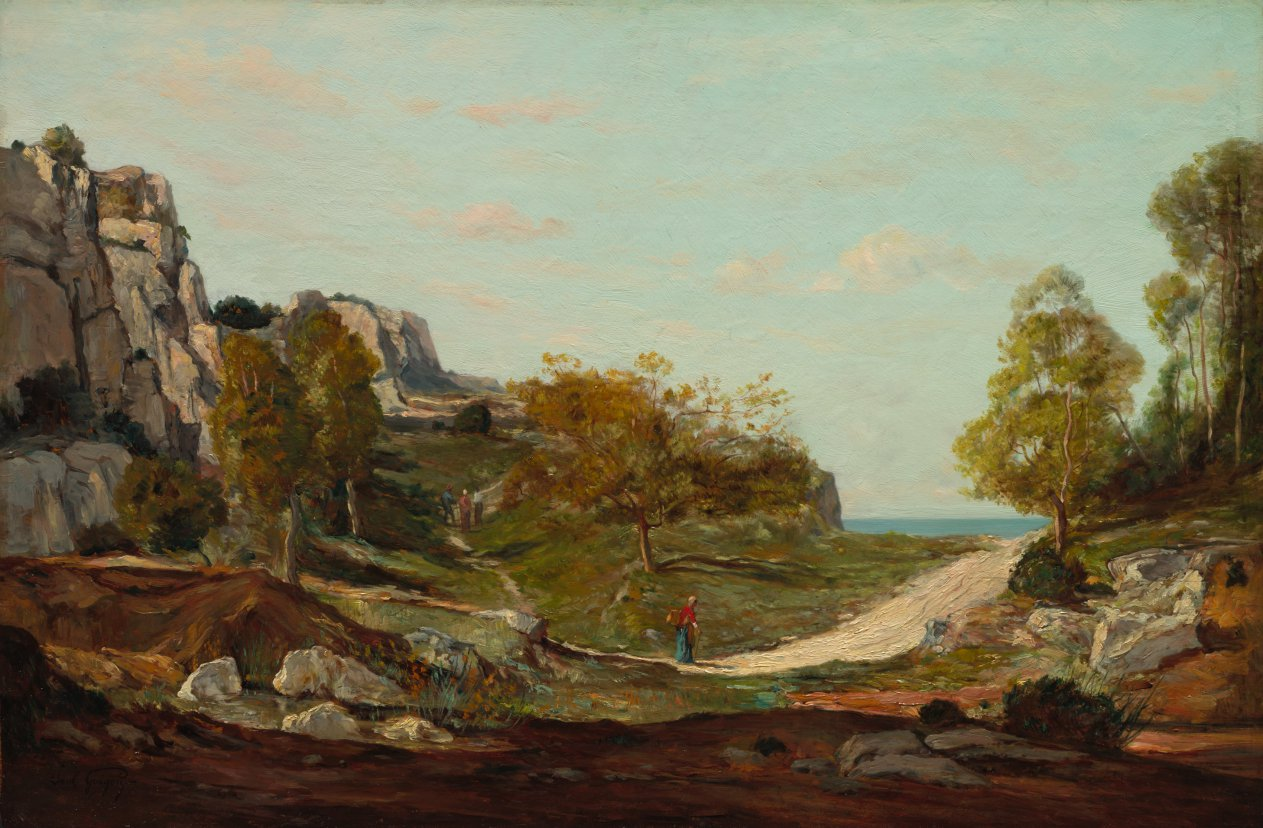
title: Landscape at Saint-André, Near Marseilles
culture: France, 19th century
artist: Paul Guigou (French, 1834–1871)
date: c. 1865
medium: oil on wood panel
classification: Painting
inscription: Signed lower left: Paul Guigou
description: This view of a rocky landscape along the Mediterranean coast of southern France reflects the naturalist ambition of capturing exact details and atmospheric effects observed directly from life. Clear, intense light floods over the stony cliffs and the sparse greenery baked in the heat of sun. The artist, l Guigou, studied art in Marseilles and devoted most of his career to painting views of his native Provence. In 1855 he began traveling back and forth between Marseilles and Paris, where he became familiar with the paintings of Gustave Courbet and died of a stroke at age 37.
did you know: Guigou was once the drawing master for the children of Baron Nathaniel de Rothschild.